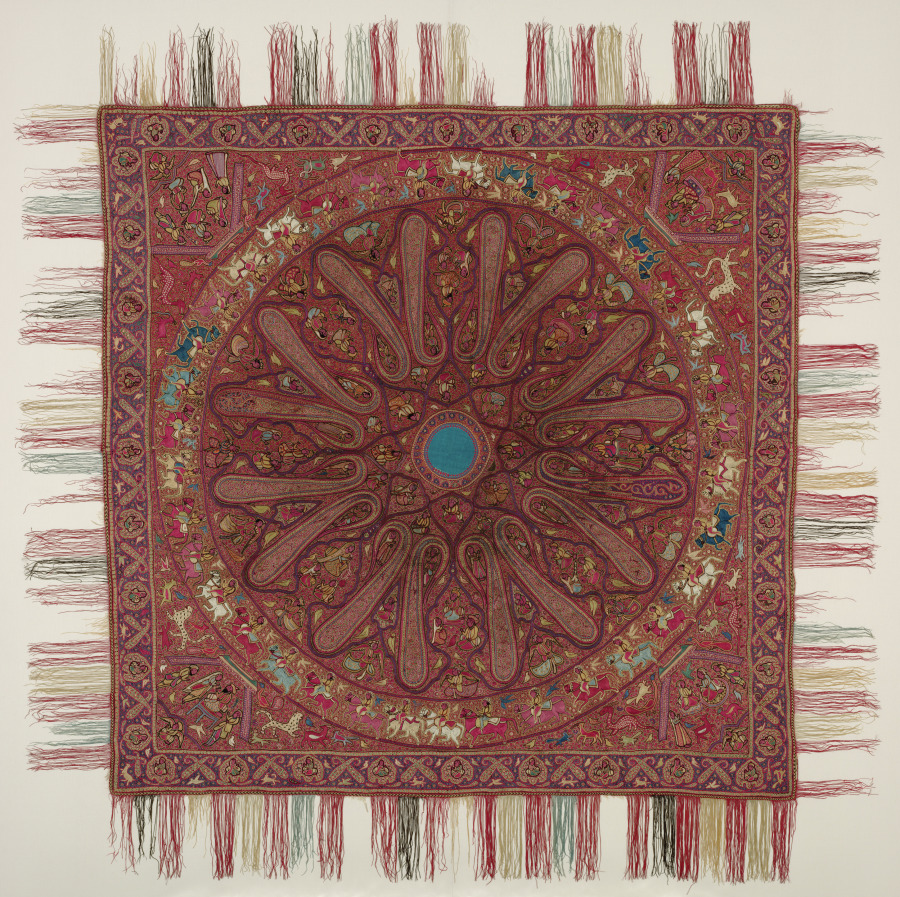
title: Square Shawl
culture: India, Kashmir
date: c. 1850–70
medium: Silk and silver filé, wool: chain stitch embroidery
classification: Embroidery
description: By the 1800s, the Himalayan foothill region of Kashmir was renowned for distinctive embroideries, and Kashmiri shawls were coveted by women throughout the British Empire. The center of this square shawl is in the form of an eight-petaled lotus, a symbol for the sun, and around it are the elongated forms of slender cypress trees, which became the inspiration for paisley. Every space is populated with figures: seated, standing, male, female, or playing musical instruments. Others are winged heavenly figures called peri. Birds are the only animals in these central spaces, suggesting a heavenly realm. In the next concentric ring riders in an equestrian procession alternate with flying birds. In the spandrels, the triangular sections between the circle and the square, are gatherings under a tent with animals. Some local Himalayan animals can be identified, such as the spotted snow leopard and the snake-eating markhor goat.